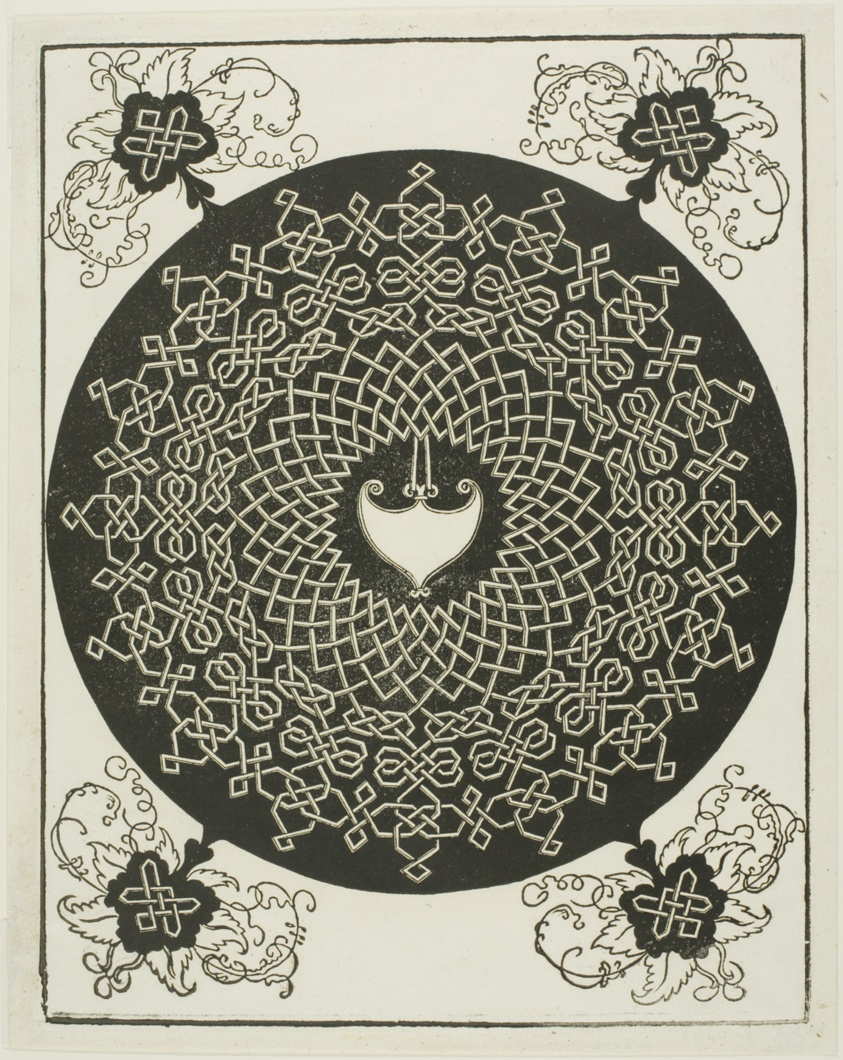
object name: Print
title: The First Knot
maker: Albrecht Dürer (German, 1471-1528)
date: c. 1507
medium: Woodcut in black on ivory laid paper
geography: Germany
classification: woodcut; print; prints and drawing; paper